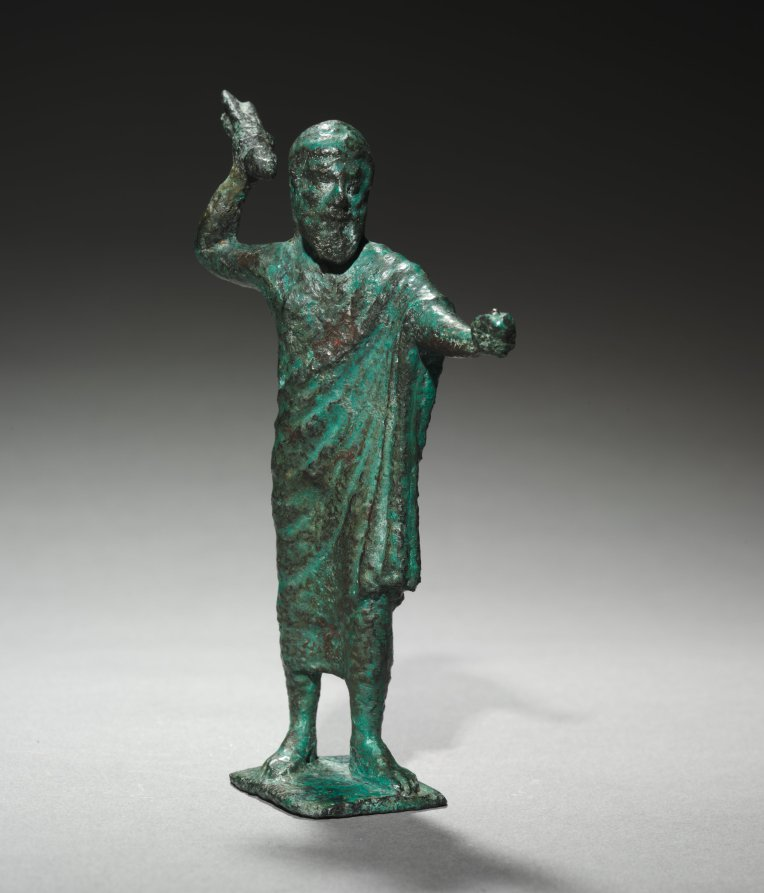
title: Statuette of Tinia (Zeus)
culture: Etruscan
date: c. 500 BCE, perhaps with modern patina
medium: bronze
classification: Sculpture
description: Tinia, the most powerful god in the Etruscan pantheon, often appears with a thunderbolt, the same attribute associated with Zeus and Jupiter in Greek and Roman religion and myth. The outstretched left hand may once have held a scepter. Although the figure finds numerous parallels among other Etruscan bronzes of the late 500s and early 400s BC, its surface is oddly rough and mottled with spots, perhaps the result of early modern treatment or coating meant to protect or improve its appearance. A 2001 analysis of the bronze composition showed results consistent with other ancient Etruscan alloys.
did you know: A break to the right wrist has been repaired with a dowel.